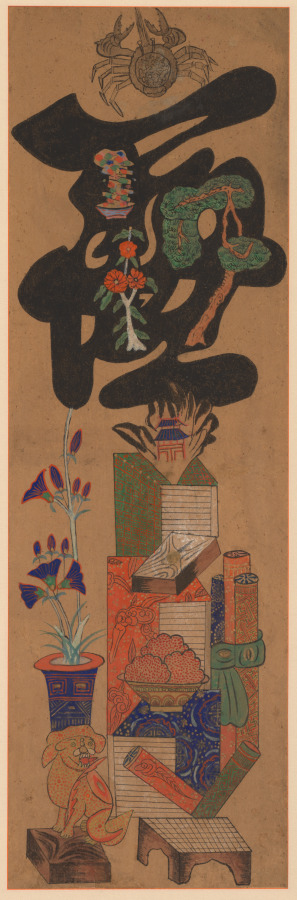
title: Munja-Chaekgeori Screen (Character-Books Screen)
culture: Korea, Joseon dynasty (1392–1910)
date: early 1900s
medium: Eight-panel folding screen, ink on paper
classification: Painting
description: This folding screen is a whimsical harmony of two different subjects: chaekgeori, or books and things; and munja, or characters. The lower section of each panel depicts the imagery of things, including books, decorative arts, and utilitarian objects. The upper portion of each panel bears a classical Chinese character. Read from far right to left, the eight characters refer to the values of Confucian teachings of the Joseon dynasty: filial piety, brotherly love, loyalty, trust, propriety, righteousness, modesty, and humility. While these two pictorial genres are harmoniously conjoined on the same picture plane, two sharply contrasting world views—urban consumerism and traditional Confucian ethics that despise materialism—compete with one another.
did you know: The eight Korean characters each mean filial piety, brotherly love, loyalty, trust, propriety, righteousness or justice, modesty or integrity, and humility or the feeling of shame.